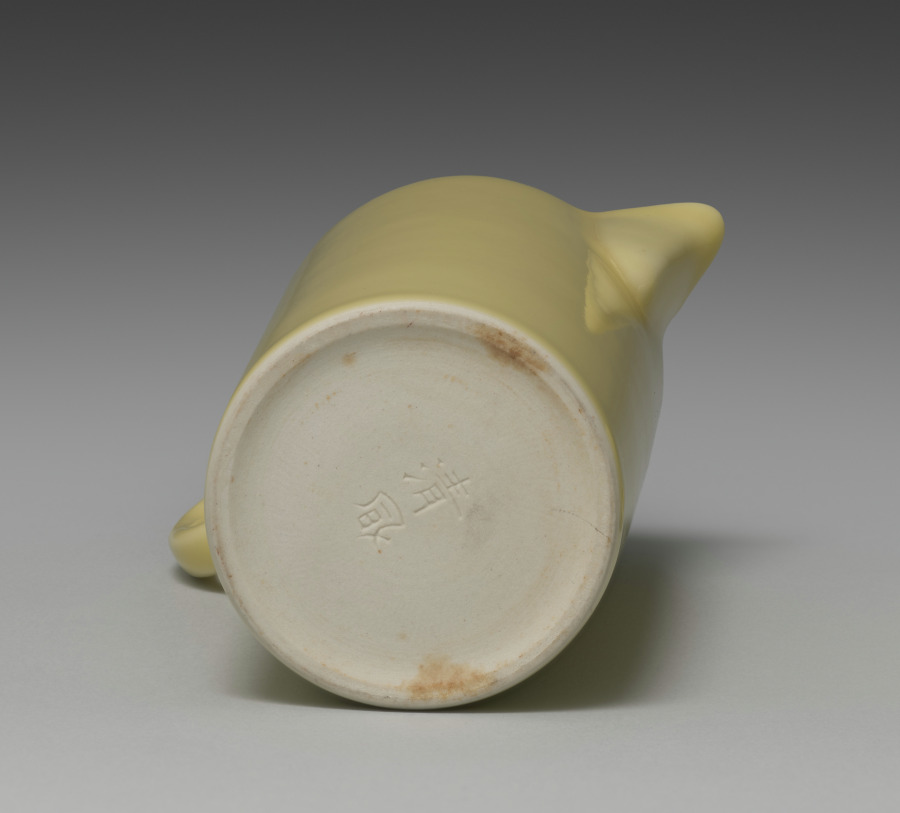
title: Sake Pourer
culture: Japan, Taishō period (1912–26) or Shōwa period (1926–89)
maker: Seifū Yohei IV (Japanese, 1872–1951)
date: 1914–46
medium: Porcelain with yellow glaze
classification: Ceramic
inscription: 清風造 。 【印】 清風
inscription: 成山清風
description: Like his father, Yohei IV also produced works with red or yellow monochrome glazes. His yellow-glazed works include this pair of sake pourers, a set of five drinking cups CMA 2022.217, and a sweets bowl molded into the shape of a chrysanthemum CMA 2022.218.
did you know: The lid's handle is made of bamboo.